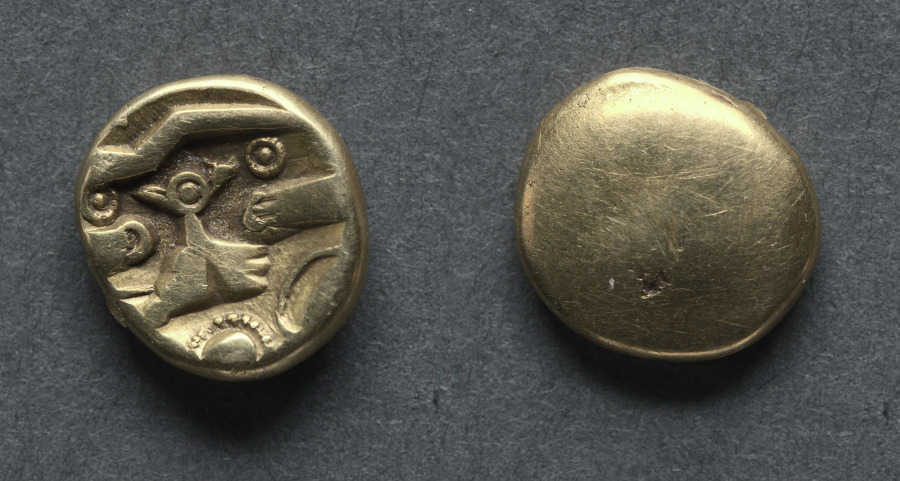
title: Quarter Stater: Tree (obverse); Plain Field (reverse)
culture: England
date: c. 125–20 BCE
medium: gold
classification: Coins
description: The smaller size of the quarter stater left the artist little room for design. Apparently he was unable to reduce the stater design to such small dimensions. The meaningless jumble is probably part of a larger design.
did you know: The tree-like trophy in the center sits on top of three ringed pellets, surrounded by various motifs.